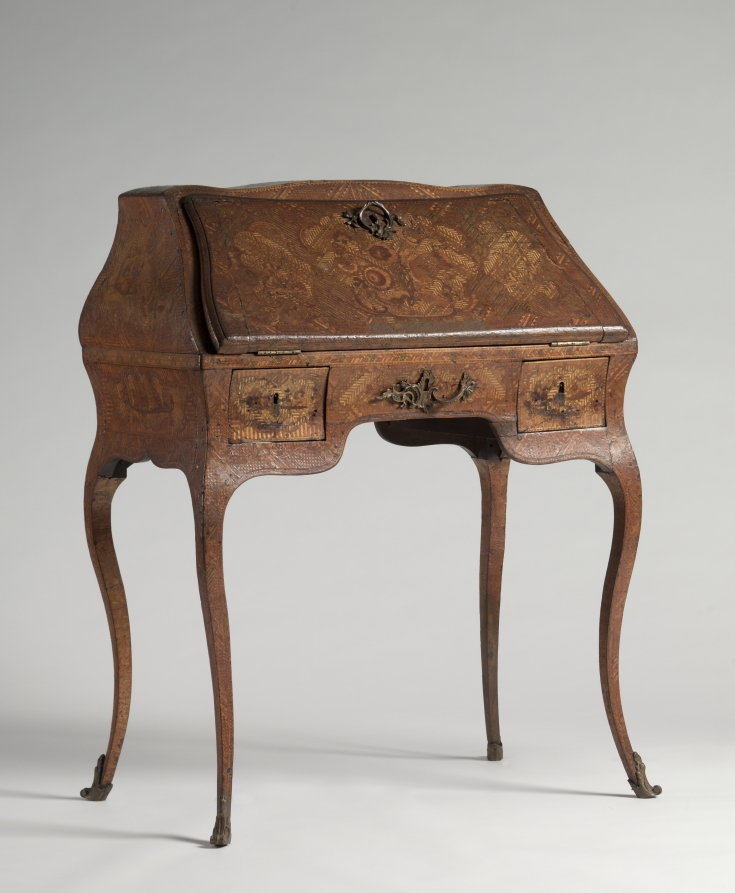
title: Ladies Writing Desk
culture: Possibly Northern Italy, near France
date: c. 1750–75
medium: Oak with straw marquetry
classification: Furniture and woodwork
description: As early as the beginning of the 17th century, straw marquetry was being produced throughout Europe. Along with cabinetmakers and specialized artisans, creators of straw marquetry included home artisans, nuns, monks, and noble dilettantes. Thus the quality and design of objects using straw marquetry is quite diverse. While some pieces appear nearly naive, others are made very masterfully, such as with this ladies writing desk. Some of these objects were even presented in royal cabinets of wonder. Because of its silky gloss and bright colors, straw marquetry was held in great esteem as unusual and remarkable decoration for furniture and other objects on par with gemstones, tortoiseshell, or ivory.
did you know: The surface of this ladies writing desk is completely covered with straw marquetry decoration both outside and in.